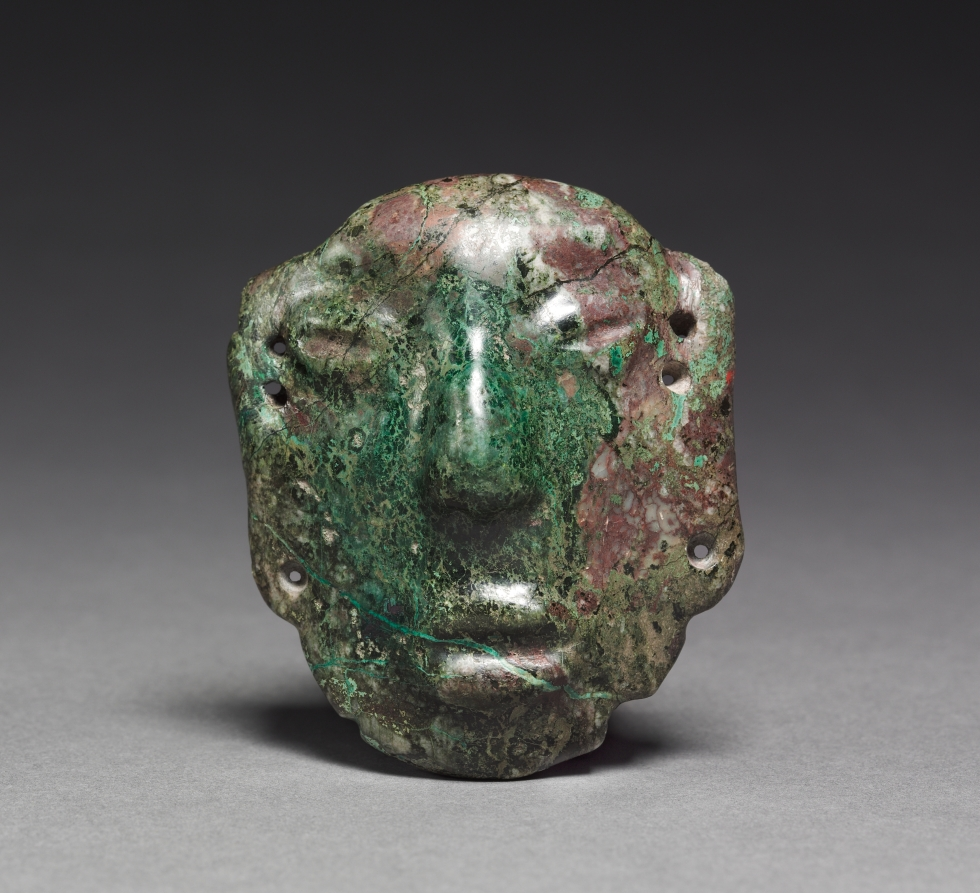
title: Mask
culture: Mexico, Guerrero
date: 1–900 CE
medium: jadeite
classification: Jade